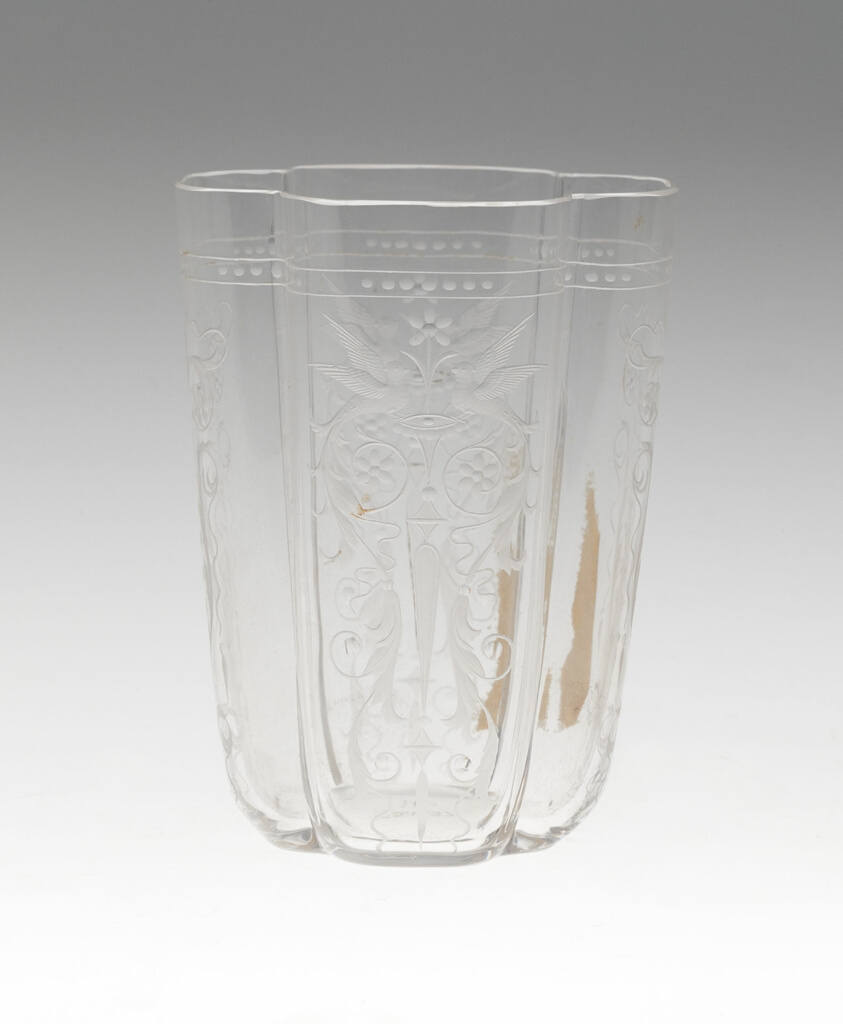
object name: Glass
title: Beaker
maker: J. & L. Lobmeyr (Austrian, founded 1822)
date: 19th century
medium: Glass; clear and blown with quadri-lobed bowl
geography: Austria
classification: glass; european decorative arts